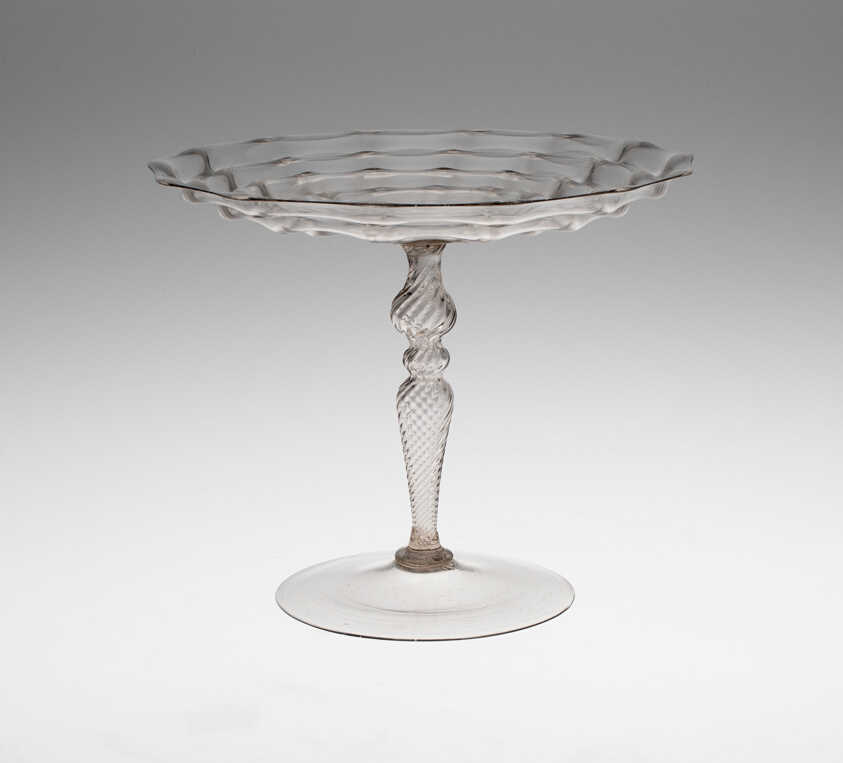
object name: Glass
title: Tazza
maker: Italian; Venice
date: 1575/1600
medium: Colorless glass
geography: Venice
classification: glass; european decorative arts